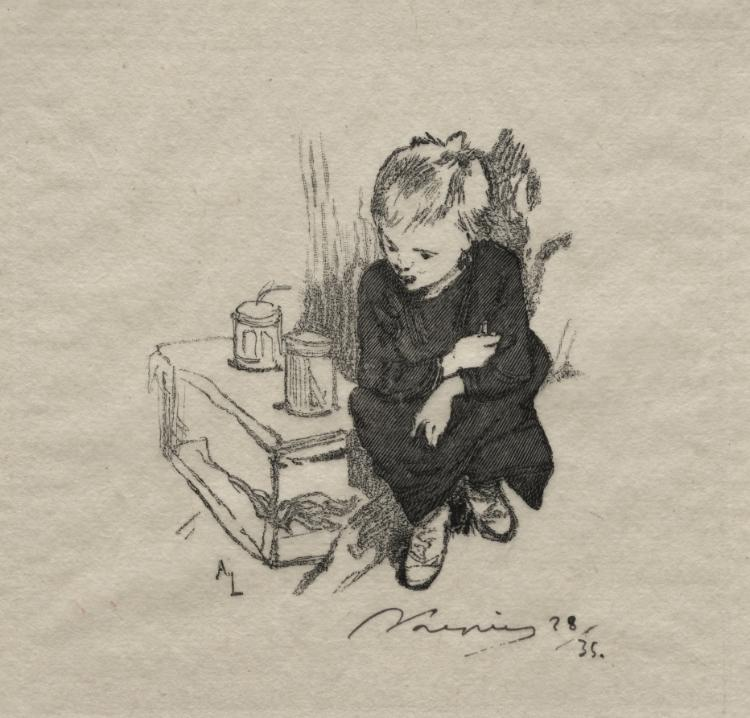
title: Le gamin a l'orset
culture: France, 19th century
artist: Auguste Louis Lepère (French, 1849–1918)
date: 1889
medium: wood engraving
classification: Print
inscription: On block, lower left corner: "A. L."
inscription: signed in ink: "28/35"